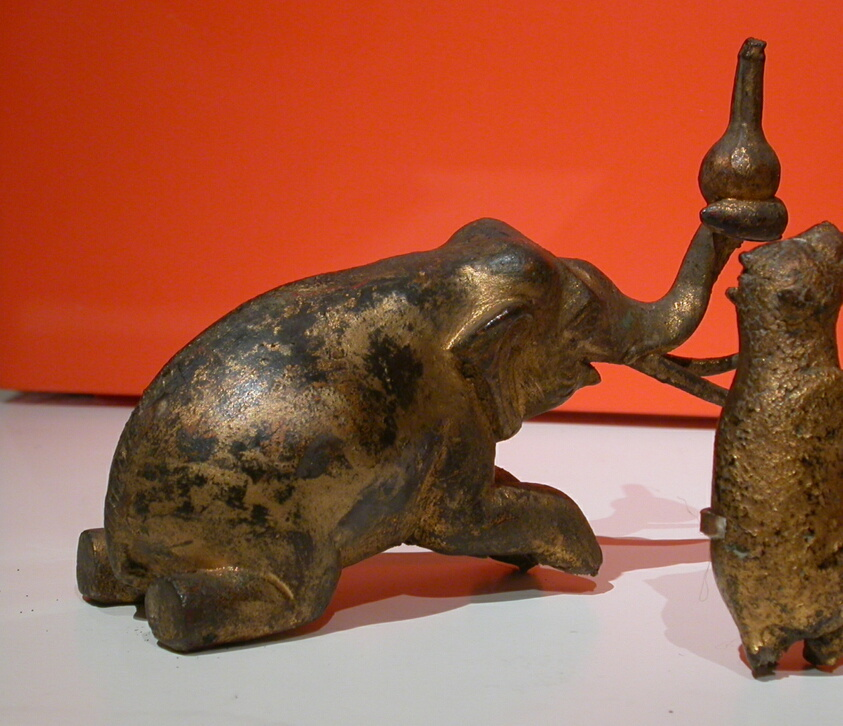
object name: Sculpture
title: Elephant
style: Southeast Asian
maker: Thailand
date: 19th century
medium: Gilded and lacquered bronze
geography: Thailand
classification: bronze; metal; sculpture; asian art